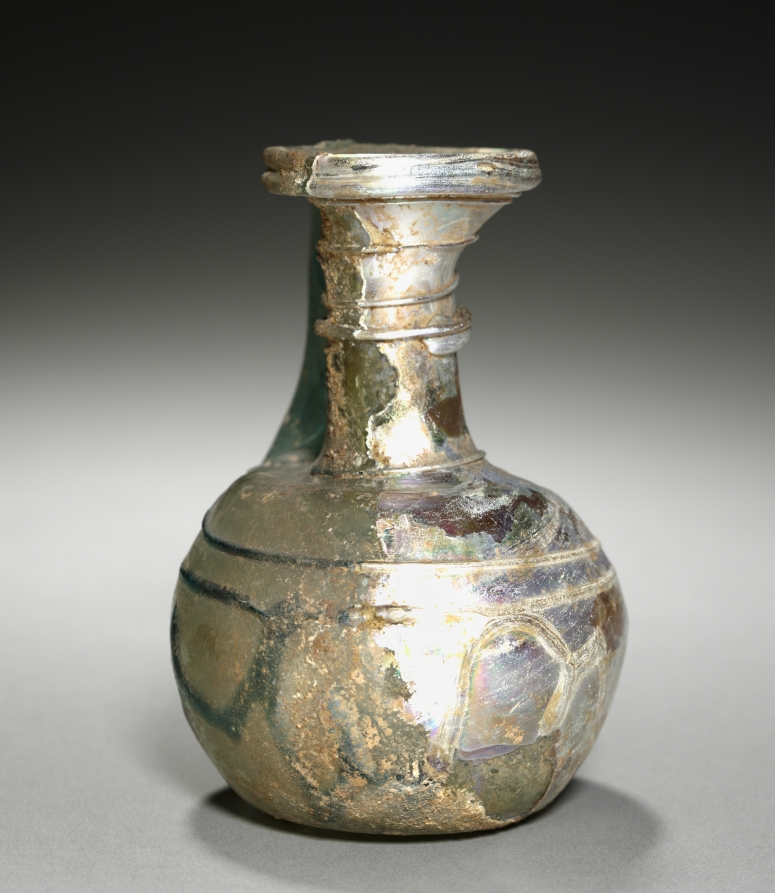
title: Squat Juglet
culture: Italy, Roman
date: 300–500 CE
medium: green glass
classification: Glass